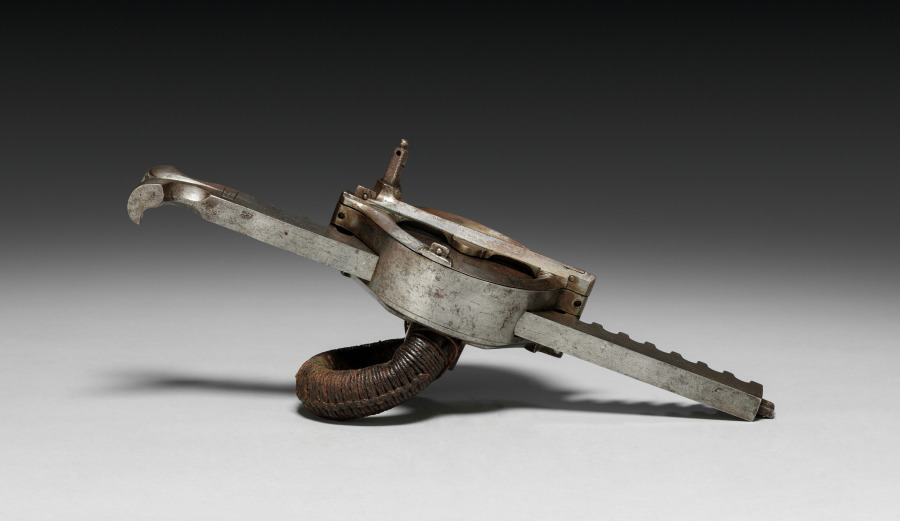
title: Cranequin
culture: Germany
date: 1600s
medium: steel, etched; flax cord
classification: Arms and Armor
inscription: inscribed 1612 (not original); maker's mark (indecipherable)